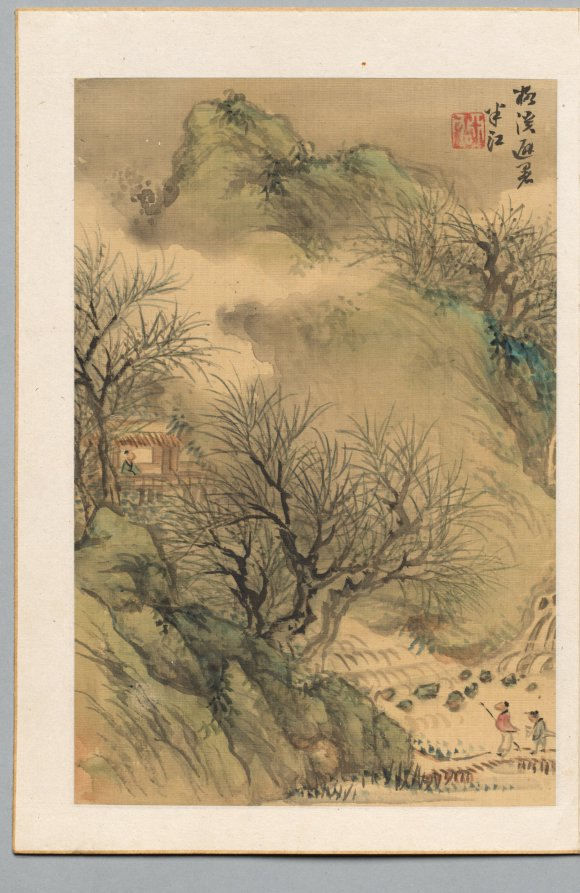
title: Summer Retreat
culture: Japan, Edo period (1615–1868)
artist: Okada Hankō (Japanese, 1782–1845)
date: early to mid-1800s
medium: leaf from a pair of folding albums; ink and light color on paper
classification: Portfolio